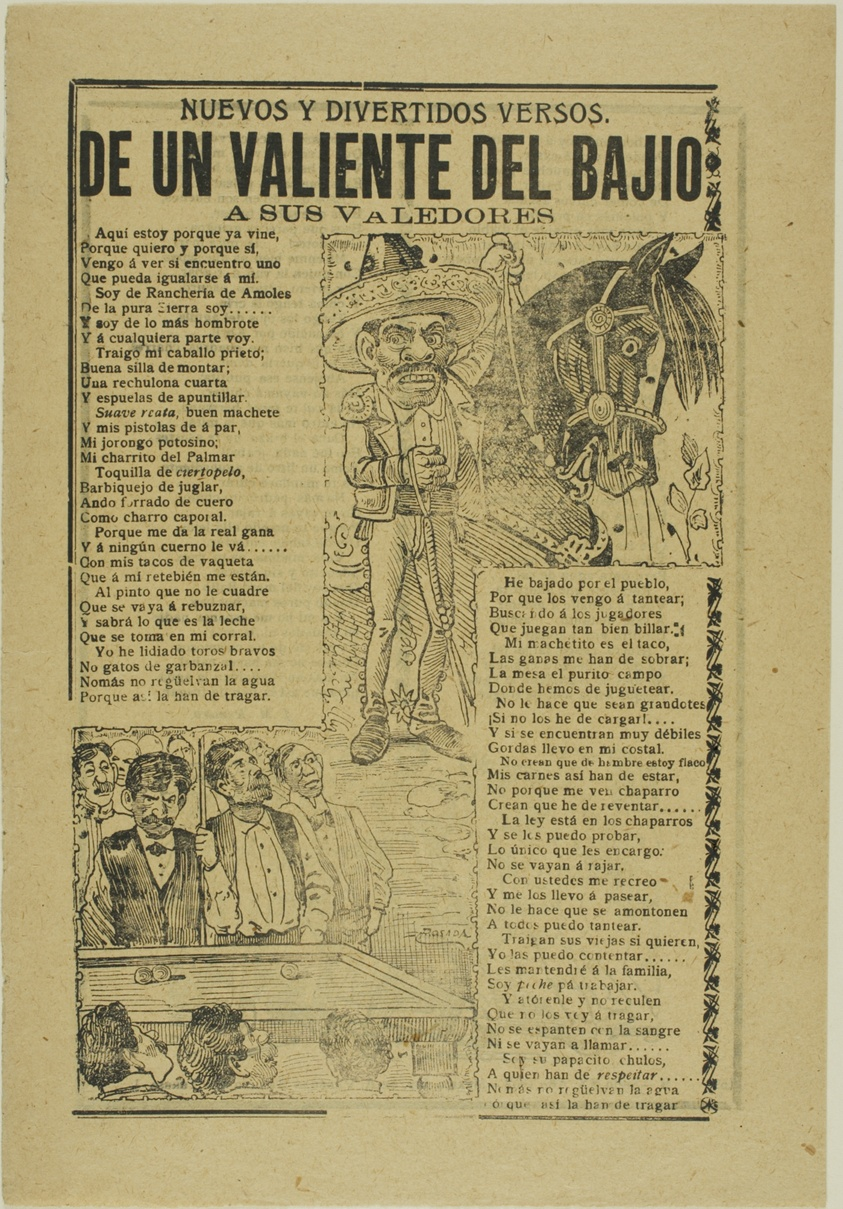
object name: Print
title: New and Diverse Verses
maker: José Guadalupe Posada (Mexican, 1852-1913)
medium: Relief etching on paper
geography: Mexico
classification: relief etching; print; prints and drawing